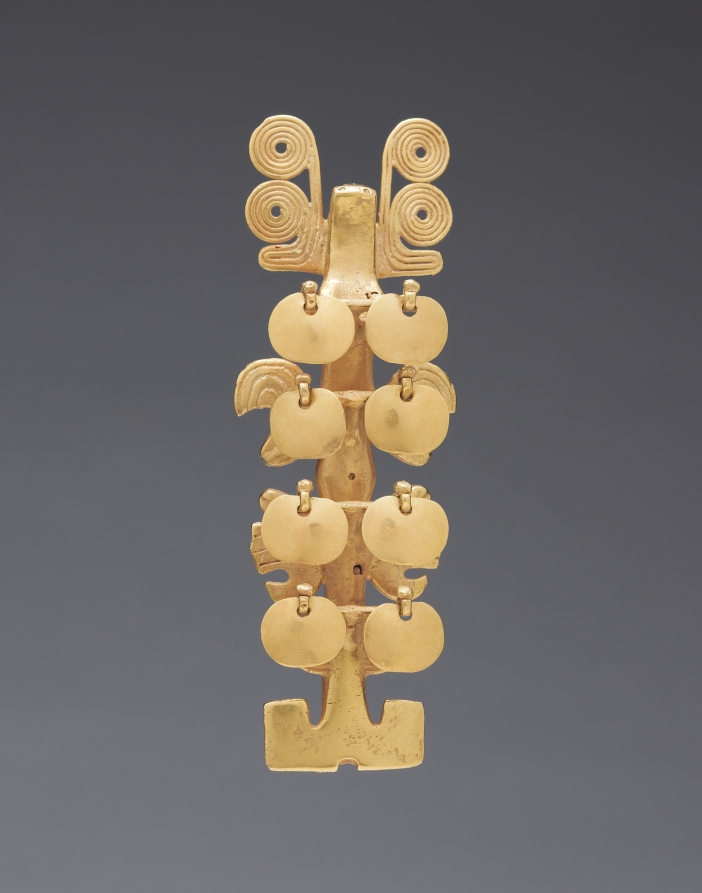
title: Pendant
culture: Panama, International Style, 5th-7th century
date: 400–700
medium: cast gold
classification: Metalwork